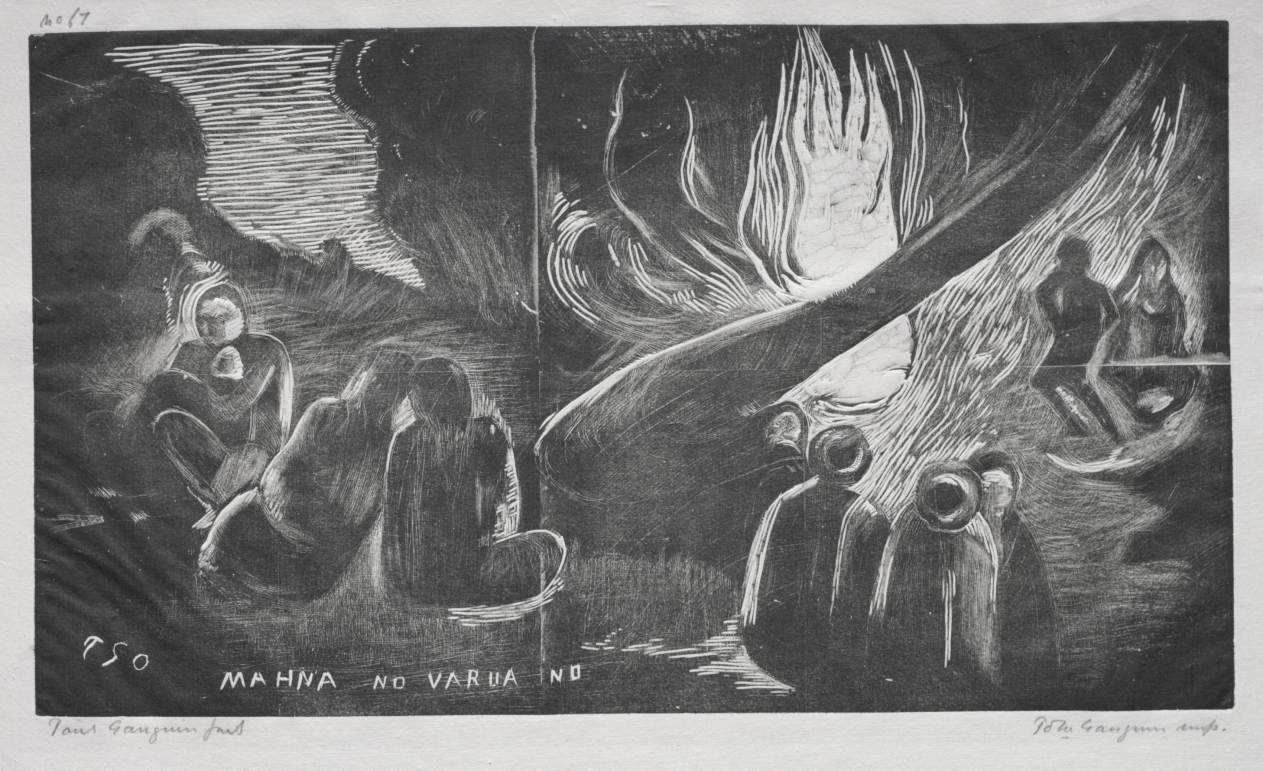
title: Noa Noa; The Devil Speaks (Mahna No Varua Ino)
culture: France, 19th century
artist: Paul Gauguin (French, 1848–1903)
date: 1893–94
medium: woodcut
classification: Print